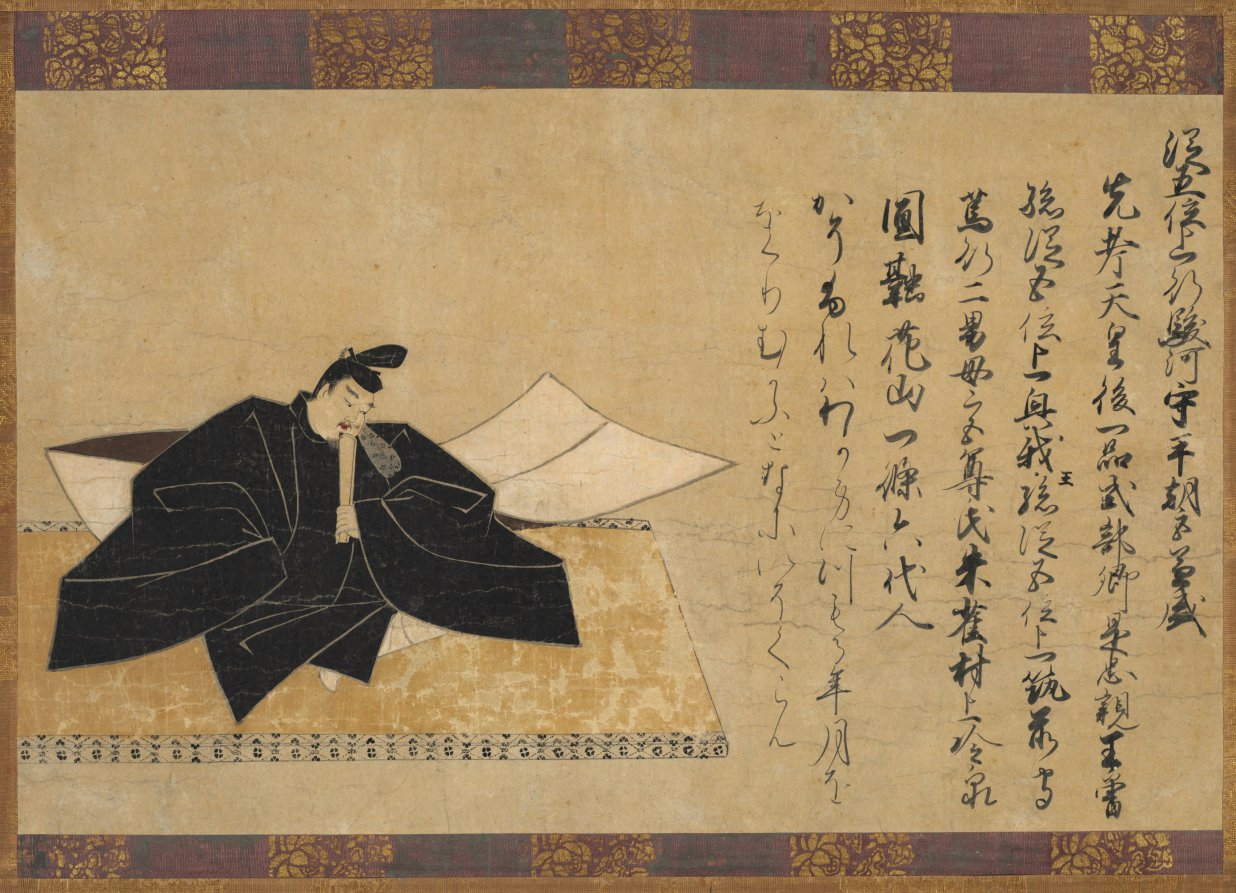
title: Taira no Kanemori of the Thirty-Six Poetic Immortals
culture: Japan, Kamakura period (1185–1333)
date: 1200s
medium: Section of a handscroll mounted as a hanging scroll; ink and color on paper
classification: Painting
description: Taira no Kanemori was one of the 36 poetic immortals of classical Japanese literature. This painting is a fragment of what was once a handscroll depicting all 36 poets.